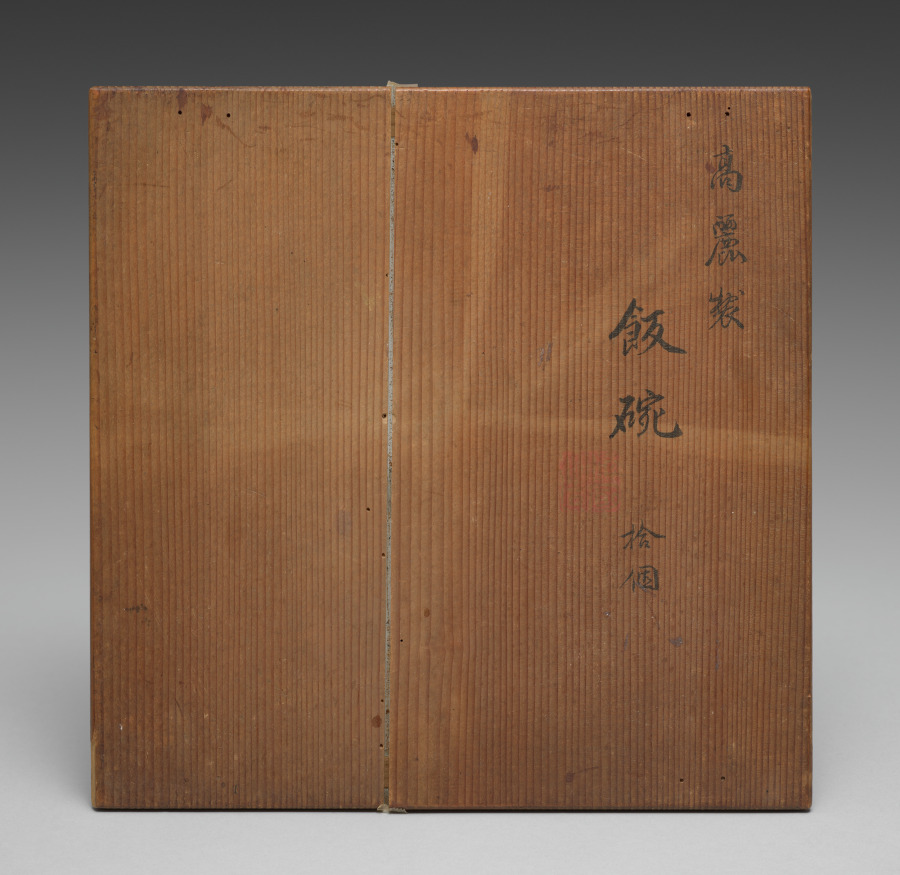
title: Dining Set with Plum Blossoms and Cracked-Ice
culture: Japan, Edo period (1615–1868) to Meiji period (1868–1912)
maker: Seifū Yohei II (Japanese, 1844–1878)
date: 1875–78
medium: Porcelain with molded designs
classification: Ceramic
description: Each item in this set has a delicate low-relief design of flowering plum branches over scattered, intersecting lines meant to resemble the cracked-ice surface of a frozen body of water and is signed on the base in gold pigment. While Yohei II produced many fine works in underglaze blue, like those produced by Kiyomizu Shichibei, he also made works in quite different styles later in his career, from the early 1870 s. In 1873, he was appointed purveyor to the Industrial Center of Kyoto Prefecture, a designation associated with Kyoto’s efforts to reach an international market through the port of Kobe; and from 1875 until his death, he was involved in national-level projects to present Japanese ceramics across the world. It was during this period that Yohei III was apprenticed to Yohei II, and it has been suggested that this set may in fact be an early example of Yohei III’s work, which he signed with his teacher’s name. Decorated with flowers resembling Japanese textile motifs, the set calls to mind the design of Yohei II’s pair of vases with plum blossoms in the Victoria and Albert Museum. Here, the elaborate trees created for a formal public exhibition setting have been translated into the approachable blossoms of the genteel domestic environment. While the designs are consistent across the pieces, each raised flower petal and pistil and each incised line in the ice was done by hand, so the cups, bowls, and dishes are similar yet unique. The bottoms of two boxes once identified the set’s owner, but the information has been deliberately obscured with black ink. However, inscriptions still visible appear to indicate two occasions, once at the end of July 1886 , and once again in June 1916 , when parts of the set were requested from Hokura in Niigata Prefecture. The location corresponds to a neighborhood in the present-day city of Jōetsu. The surname Tsuji 辻 also appears on a paper tag affixed to one of the box cloths. Future research may possibly reveal more about their provenance. A vase by Yohei III in a private collection combines the formal grandeur of the Yohei II vases in the Victoria and Albert Museum with the gentler design of this dining set, placing flowering plum trees against soft, scalloped-edge clouds resembling those in golden screens.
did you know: The dining wares have a creamy white coloration that the four boxes containing them identify as Korean in style.